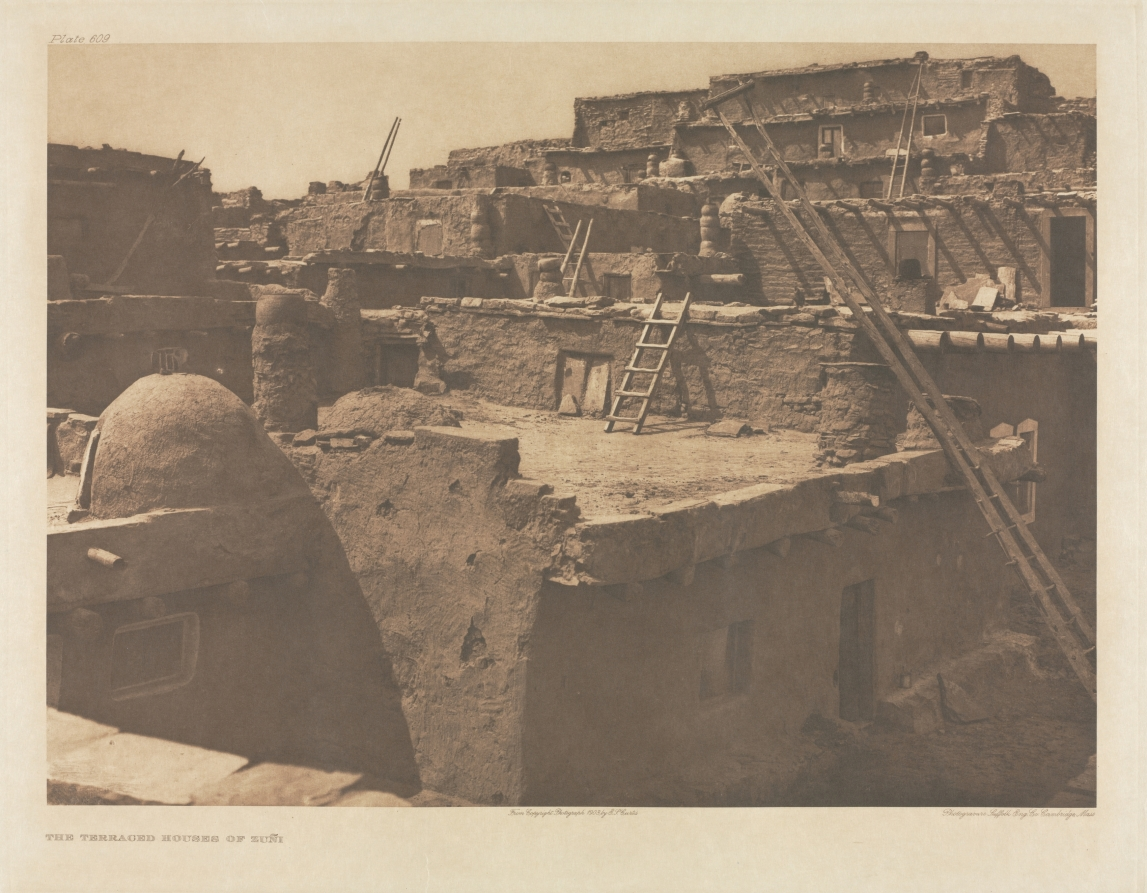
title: Portfolio XVII, Plate 609: The Terraced Houses of Zuñi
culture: America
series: The North American Indian: being a series of Portfolios picturing and describing the Indians of the United States, the Dominion of Canada, and Alaska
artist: Edward S. Curtis (American, 1868–1952)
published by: The University Press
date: 1903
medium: photogravure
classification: Portfolio